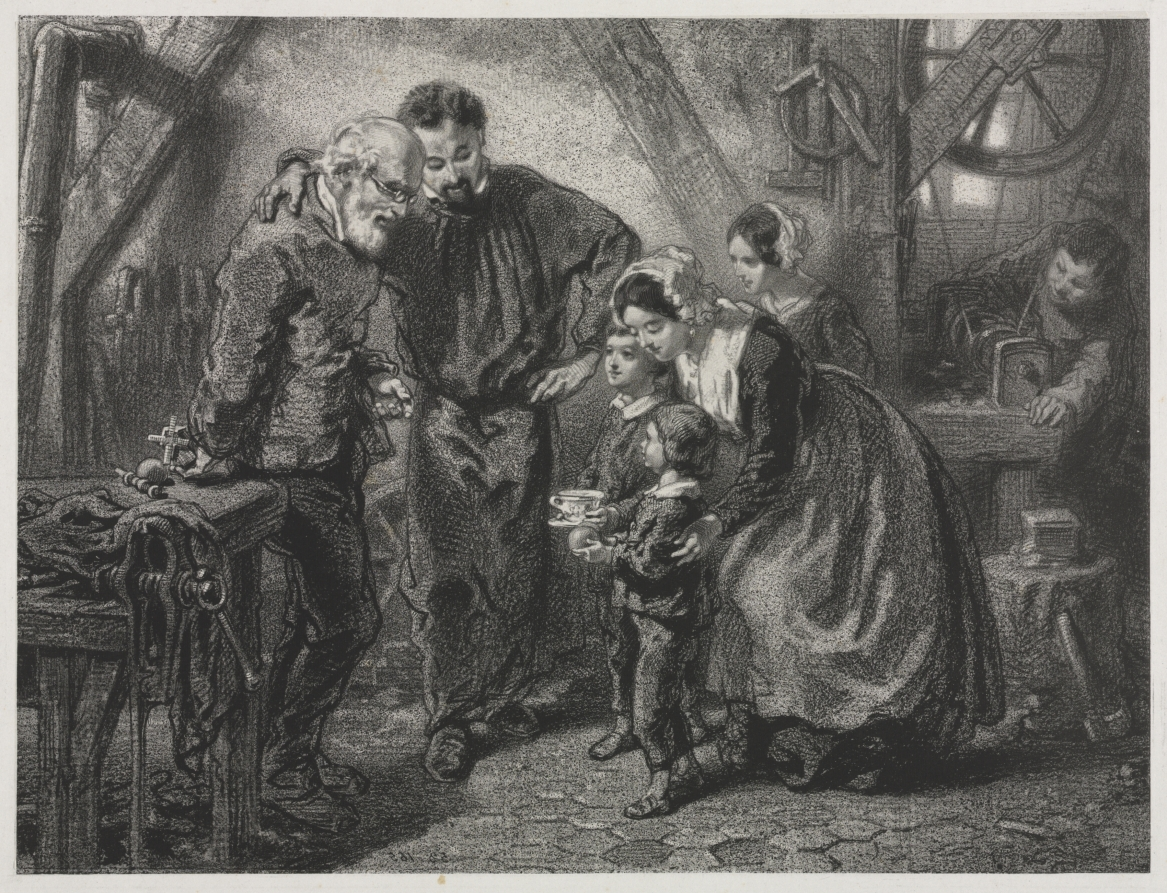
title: The Working-man's Birthday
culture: France, 19th century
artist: Paul Gavarni (French, 1804–1866)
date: c. mid-1800s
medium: lithograph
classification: Print